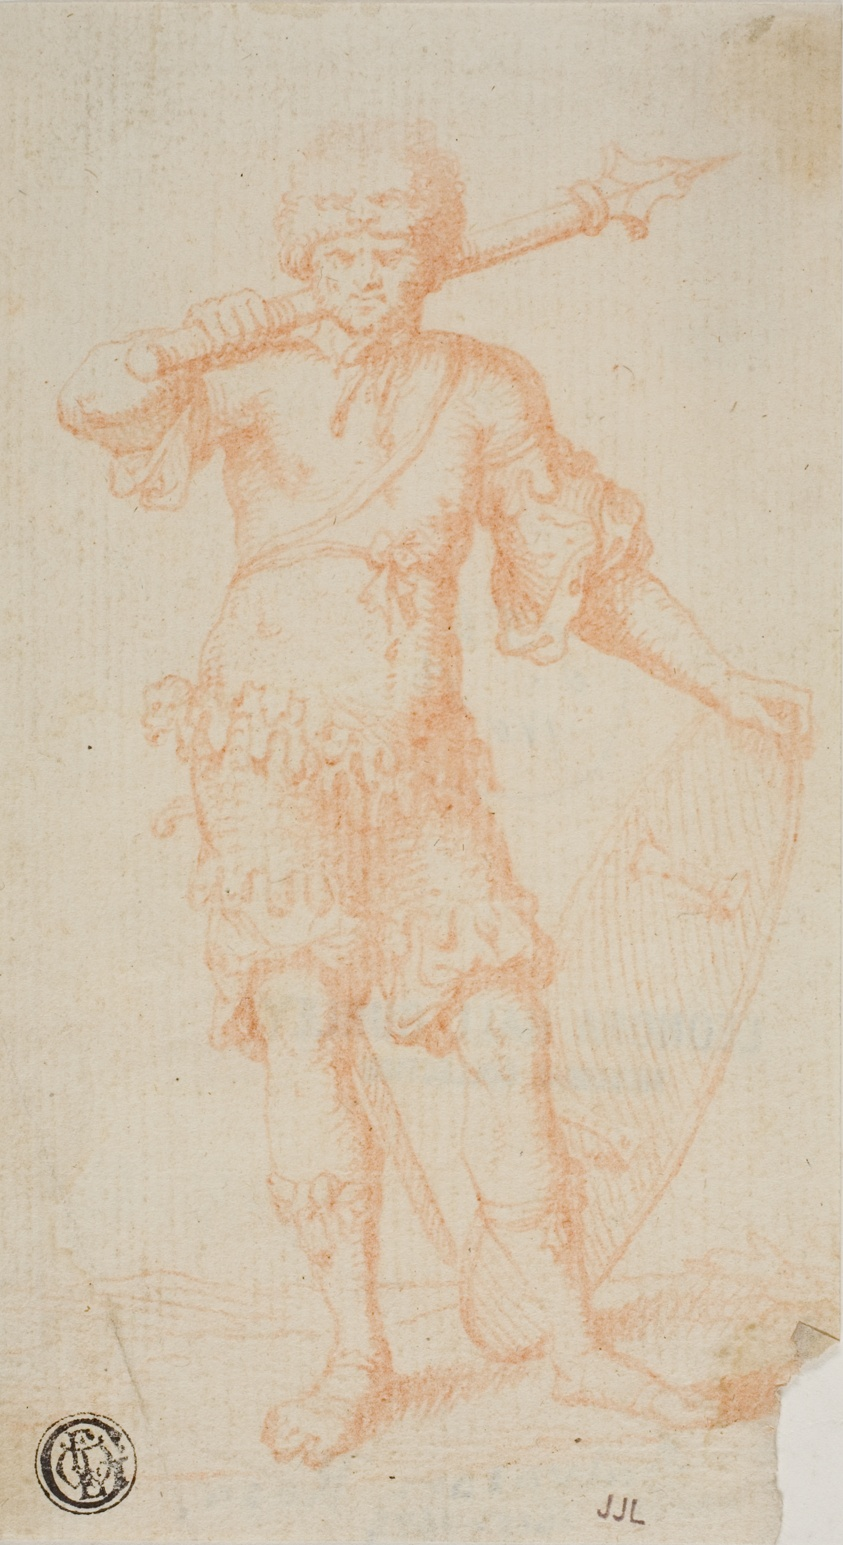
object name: Drawing and Watercolor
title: Standing Warrior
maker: After Salvator Rosa; Italian, 1615-1673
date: 1635/99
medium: Red chalk transfer onto ivory laid paper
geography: Italy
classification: chalk; drawings (visual works); prints and drawing